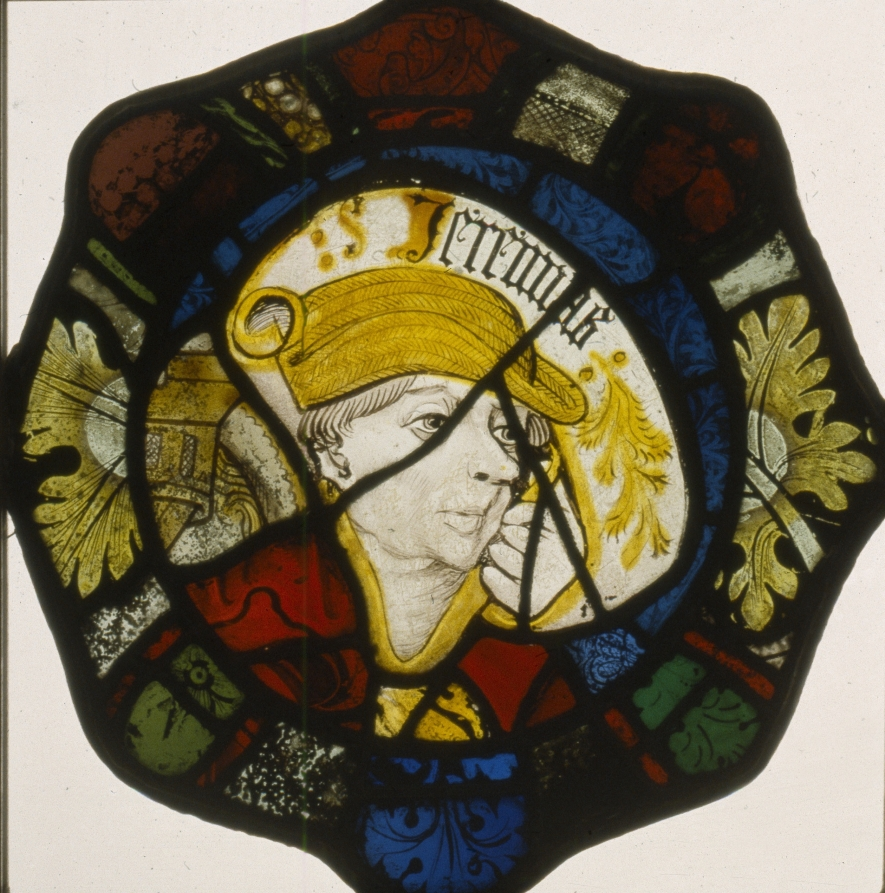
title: Jeremiah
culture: England, 15th century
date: c. 1440–1450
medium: white glass with silver stain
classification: Glass